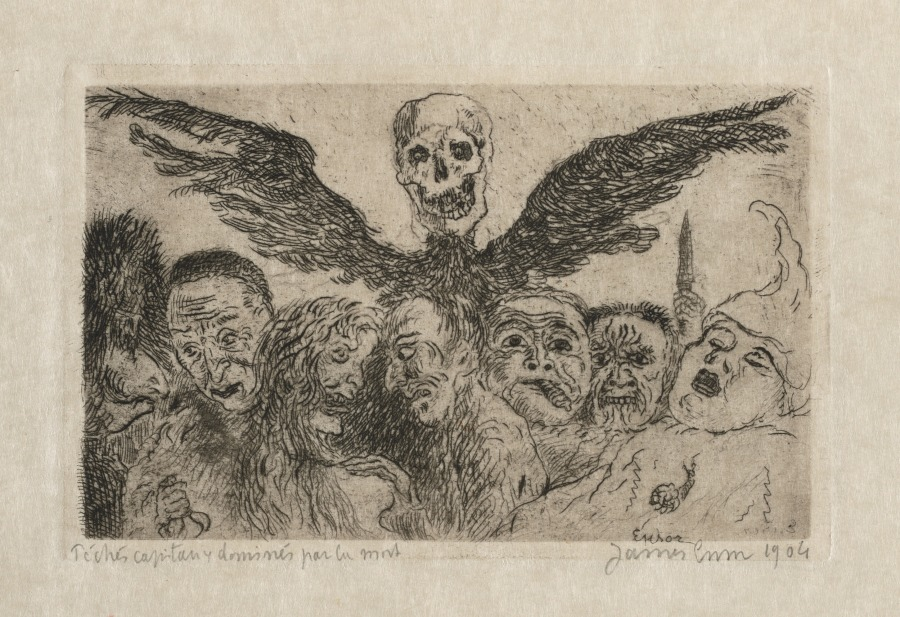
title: The Seven Deadly Sins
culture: Belgium, 19th-20th century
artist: James Ensor (Belgian, 1860–1949)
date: 1902–1904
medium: etching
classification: Print